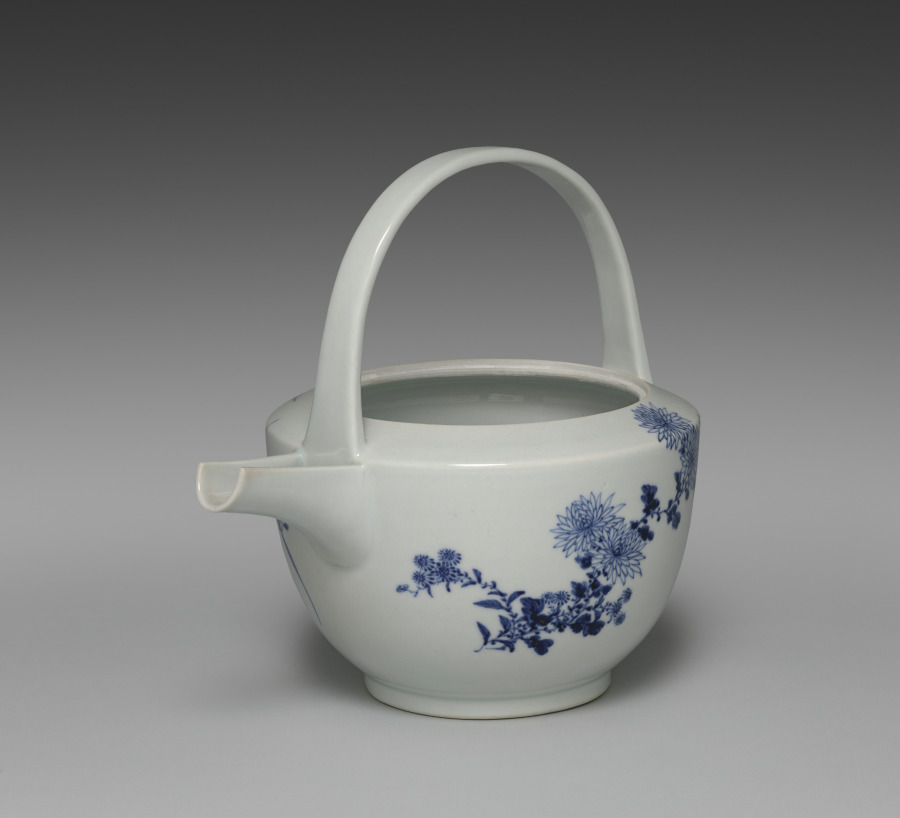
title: Sake Pourer with Chrysanthemum, Orchid, and Plum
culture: Japan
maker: Seifū Yohei III (Japanese, 1851–1914)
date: c. 1887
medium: Porcelain with underglaze blue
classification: Ceramic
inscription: Artist's signature in underglaze blue on the base.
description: This sake pourers has a wide basin with a low foot; a generous spout open across the top half; a flat, round lid with a small knob recessed flush to the top of the container; and a tall, arched handle that meets the container where the top joins the basin at a sharp angle. It has a painting in underglaze blue of the Four Nobles: chrysanthemum, orchid, plum, and bamboo. Unlike the creamy white color of some Yohei III works, the white of this sake pourer has the bluish cast typical of porcelains produced in Kyoto. It is signed in underglaze blue on the base.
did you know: This sake pourer is decorated with the Chinese theme of the Four Nobles, in which the qualities of a good person are represented by plant.